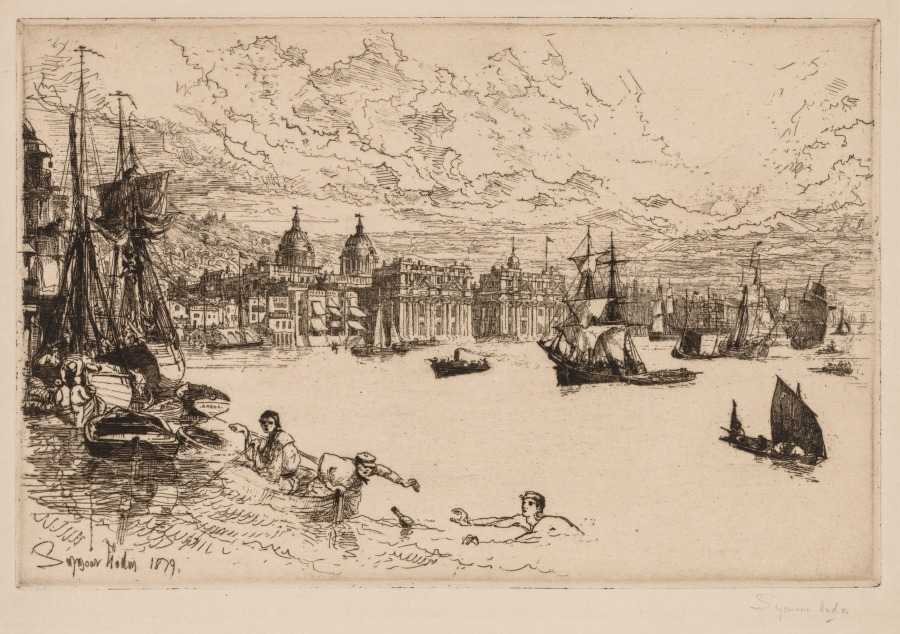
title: Greenwich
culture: England, 19th century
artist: Francis Seymour Haden (British, 1818–1910)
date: 1879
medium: etching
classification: Print